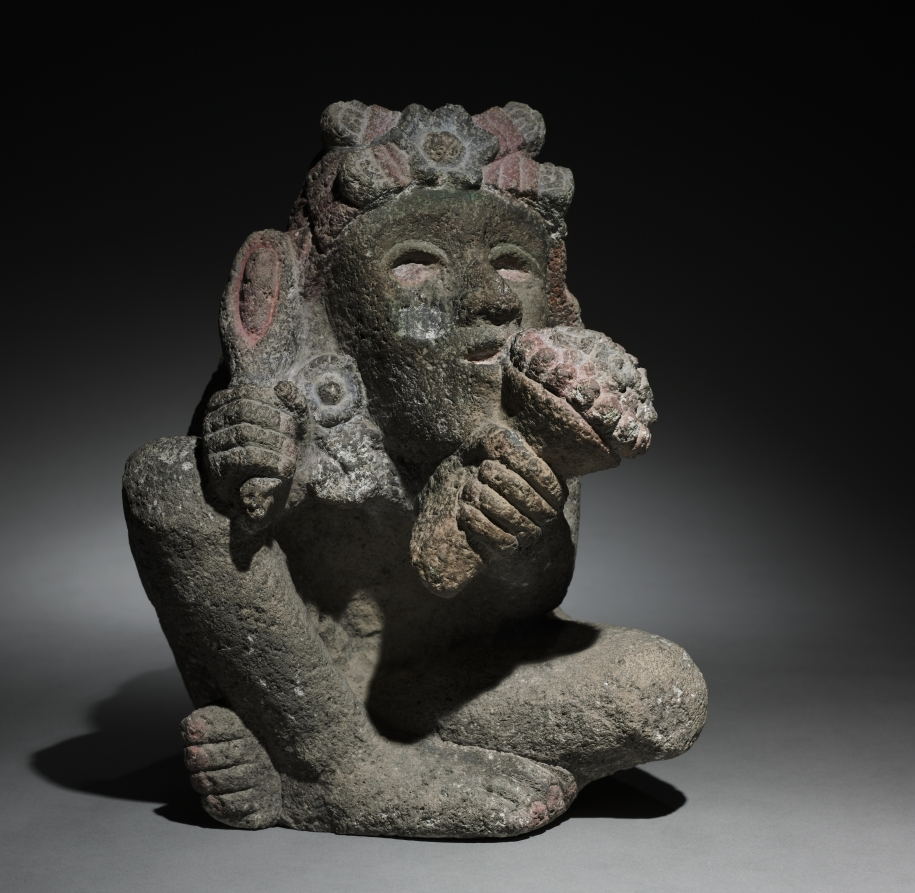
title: Seated Male Carrying Maize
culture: Central Mexico, Aztec style, 13th-16th century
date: 1325–1521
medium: stone, pigment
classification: Sculpture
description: This figure probably represents an Aztec deity-either Macuilxochitl or Xochipilli-whose domain was beauty, the arts, and such pleasures as gameplaying, dancing, and sex. Both names include the Aztec word for "flower," and in one hand the figure holds a cone of flowers, perhaps the blossoming crown of a cactus. For the Aztecs, flowers signified beauty, refinement, and fertility in general and sexuality in particular. The burden of maize cobs on his back also may allude to his creative energies.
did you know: Macuilxochitl is one of five gods of excess pleasure, and the punishment that follows.